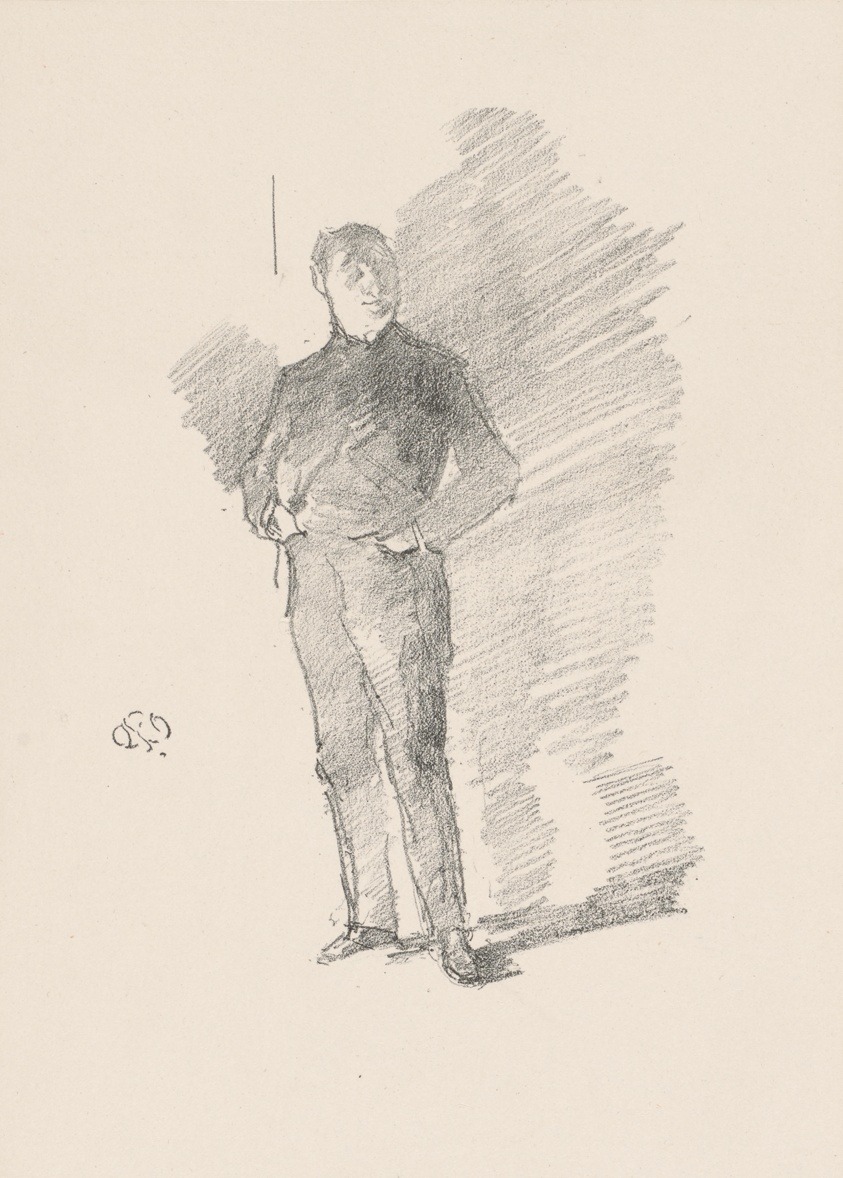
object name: Print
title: Study No. 2: Mr. Thomas Way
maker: James McNeill Whistler (American, 1834-1903)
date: 1896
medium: Transfer lithograph in black on grayish ivory chine, laid down on cream wove Japanese vellum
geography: United States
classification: transfer lithograph; lithograph; print; prints and drawing